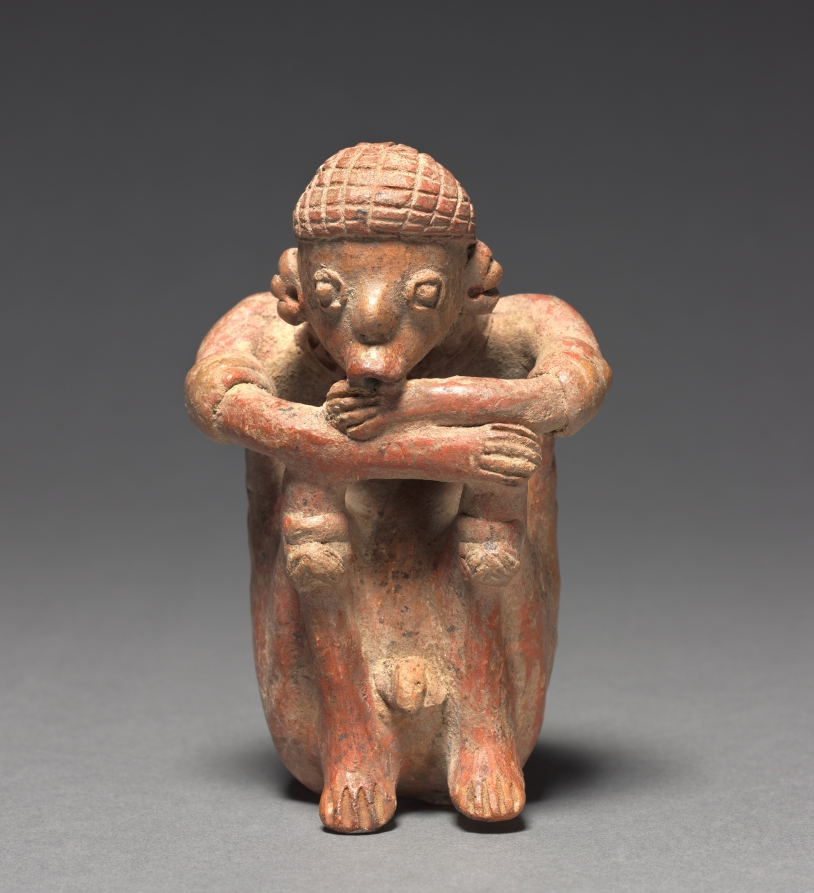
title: Emaciated Crouching Figure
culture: Mexico, Nayarit, San Sebastian Red Style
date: c. 100 BCE–300 CE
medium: earthenware with burnished red slip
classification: Sculpture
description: The protruding ribs and staring eyes of this melancholy figure may show the effects of a ritual fast, rather than famine. Fasting purified an individual in preparation for religious rites and may have enhanced the search for supernatural visions.